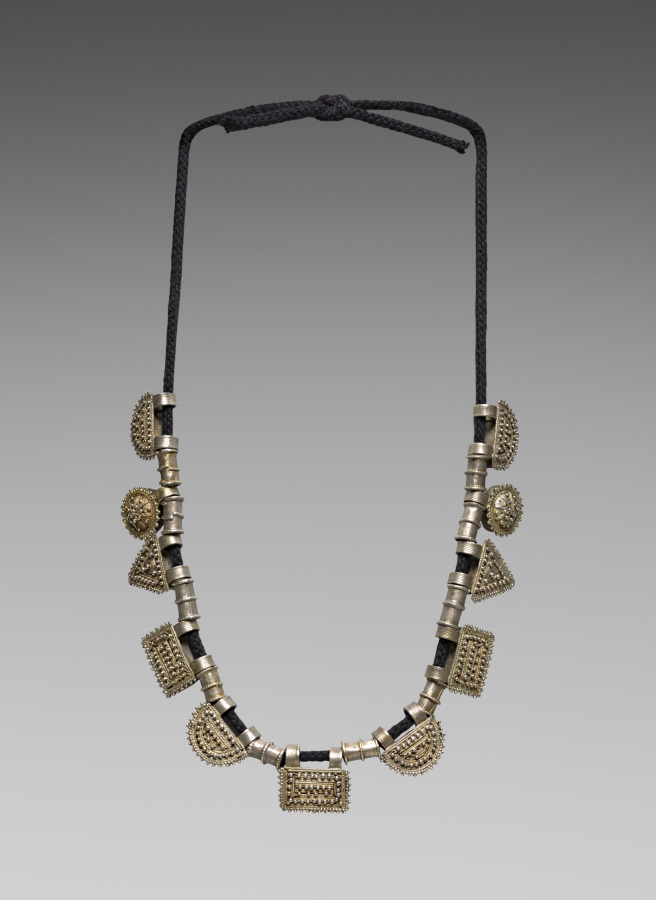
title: Necklace (ashän ketab) with amulet pendants (tälsäm)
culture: Africa, East Africa, Ethiopia, unknown silversmith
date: late 1800s or early 1900s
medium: silver alloy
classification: Jewelry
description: Ornate filigree jewelry was historically made in Ethiopia for royals and nobility by specialized silversmiths trained through long apprenticeships. This silver necklace is composed of numerous box-shaped amulet pendants (tälsäm) meant to ward off the evil eye or other dangers. Linked to Islamic amuletic practices, the boxes are effective whether empty or whether they contain magical or prayerful texts. Their fine filigree and granulation work is characteristic of Harar as well as the Ethiopian Orthodox Christian city of Aksum.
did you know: Ethiopian silver jewelry is made by melting high-purity Maria Theresa thaler coins made from the 1700s to the 1900s.